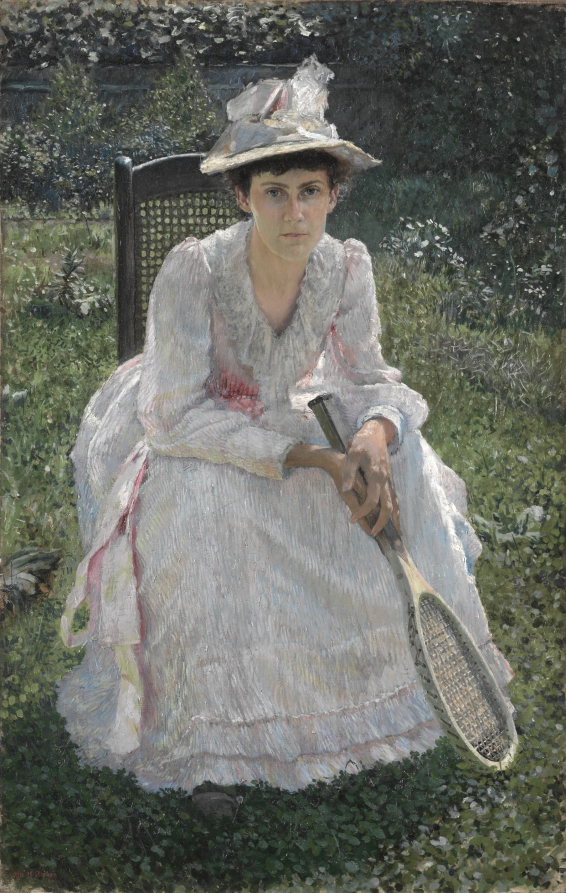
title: Mary Holland Bacher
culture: America, Ohio, Cleveland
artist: Otto H. Bacher (American, 1856–1909)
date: 1891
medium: oil on canvas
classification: Painting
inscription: signed lower left: Otto H. Bacher. / --91.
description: Bacher was the first artist from Cleveland to achieve international renown, and this portrait of his wife exemplifies the Impressionist style he adopted after studying in Paris during the late 1880s. The painting’s unusual subject testifies to the emergence of tennis as one of the few sports of the era in which women could participate without being considered inappropriately masculine or uncouth.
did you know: As a child, Otto Bacher liked to sketch shipping activities around Cleveland's port.